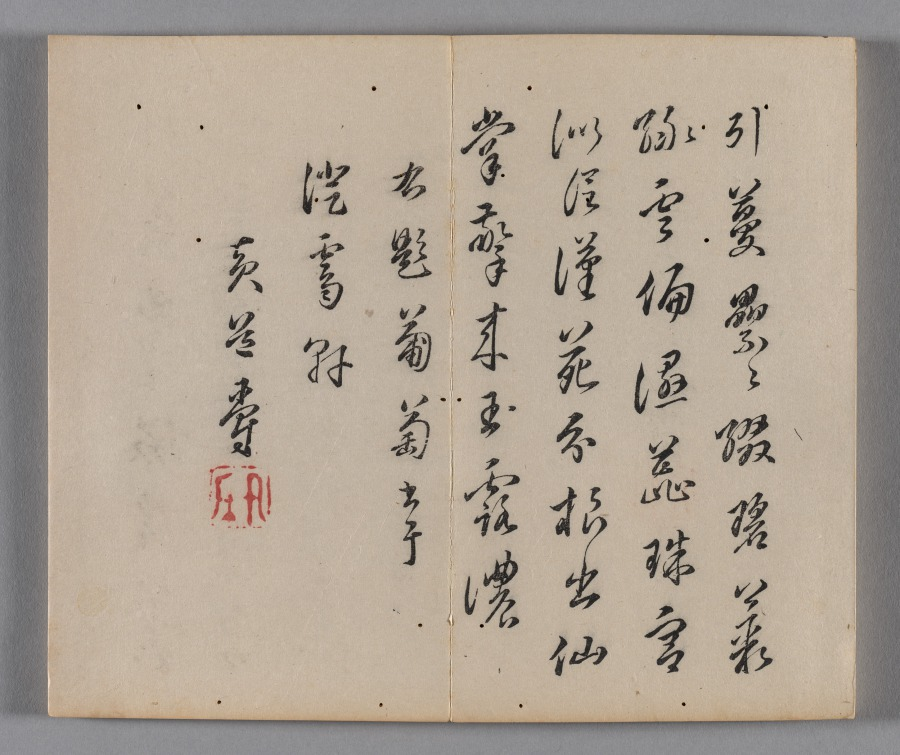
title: Ten Bamboo Studio Painting and Calligraphy Handbook (Shizhuzhai shuhua pu): Fruit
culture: China, Qing dynasty (1644-1911)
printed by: Hu Zhengyan (Chinese, c. 1584–1674)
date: 1633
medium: Woodblock-printed book; ink and colors on paper; first edition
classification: Print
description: Color printing reached a level of perfection in the early 1600s, as seen in this Ten Bamboo Studio Collection of Calligraphy and Painting and the Mustard Seed Garden Manual of Painting (printed 1679 and 1701). The painterly quality, precision in registering (aligning) the woodblocks, and harmonious colors made them the most successful color print editions in Chinese history. Both editions were printed and compiled in Nanjing, spread nationwide, and had a great impact on the arts in Japan and Korea.